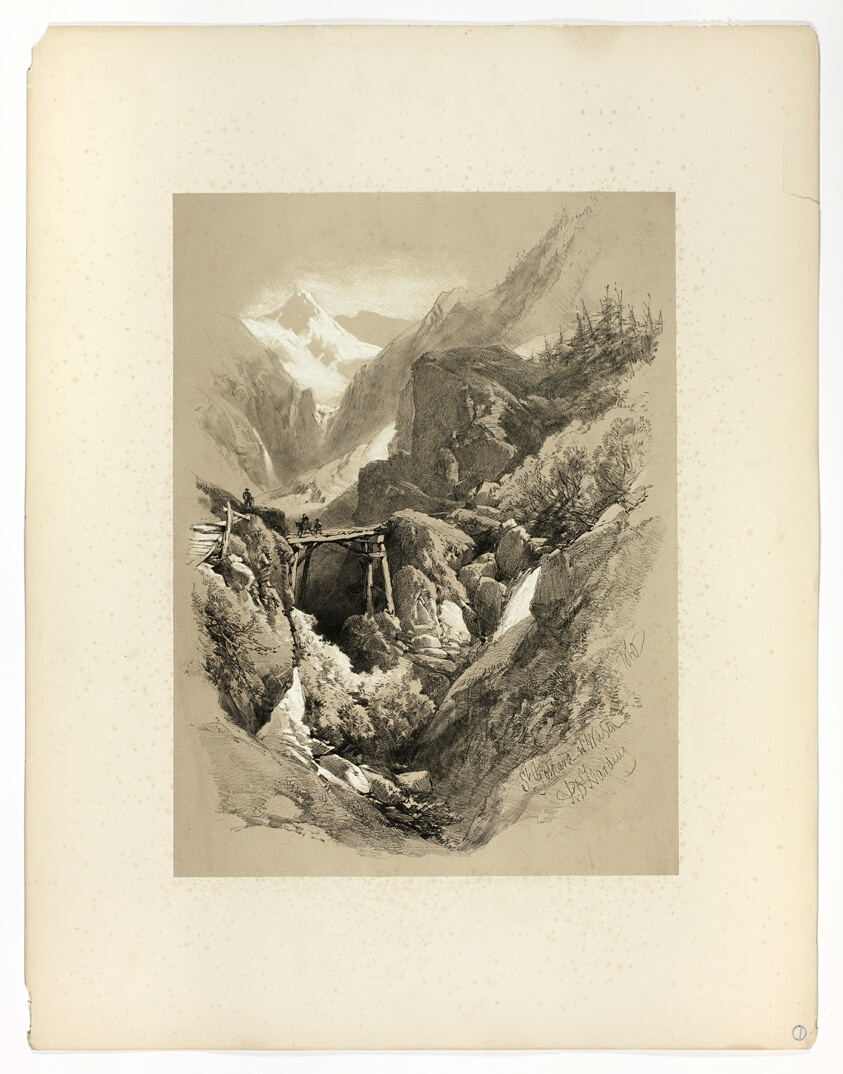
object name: Print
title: Saint Gothard, W. Wasen, from Picturesque Selections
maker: James Duffield Harding, (English, 1798-1863); Published by W. Kent and Co.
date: 1860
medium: Lithograph on paper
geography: England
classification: lithograph; print; prints and drawing